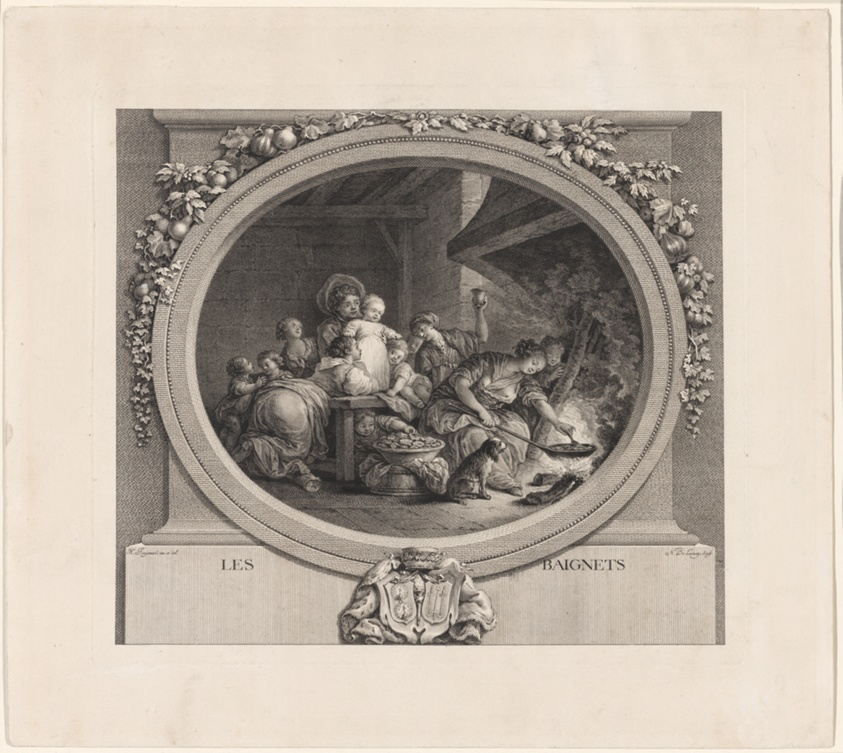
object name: Print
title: Fritters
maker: Nicolas Delaunay (French, 1739-1792); after Jean-Honoré Fragonard (French, 1732-1806)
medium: Engraving in black ink on ivory laid paper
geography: France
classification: etching; print; prints and drawing